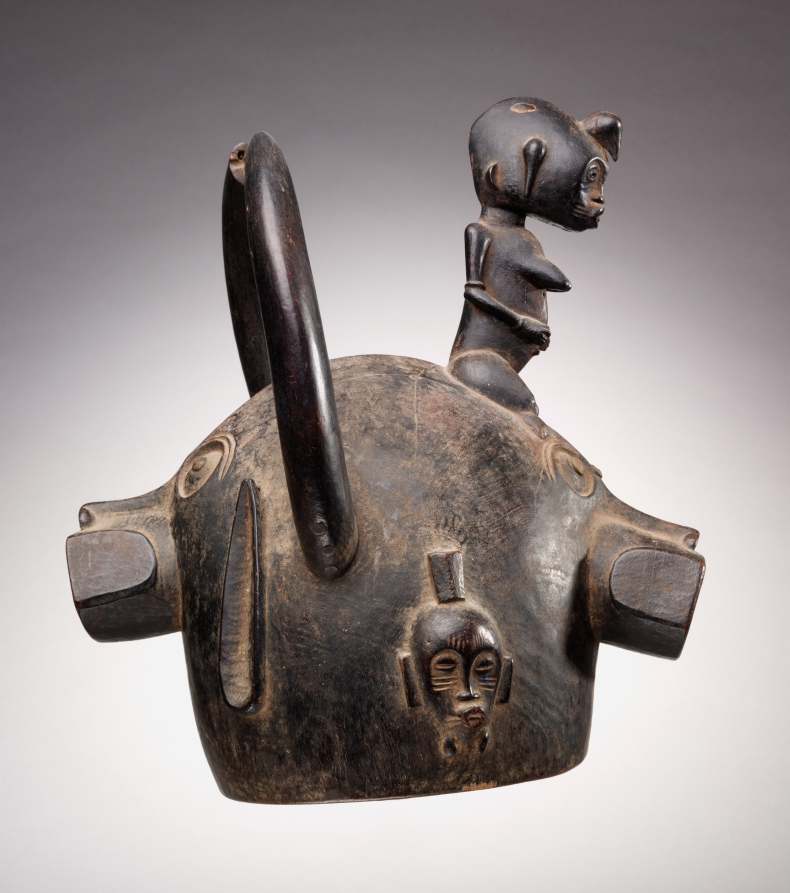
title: Helmet Mask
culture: Africa, West Africa, Côte d'Ivoire, Senufo-style carver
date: early to mid-1900s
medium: Wood, upholstery studs, and colorant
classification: Mask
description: This type of helmet was worn in rituals demonstrating a boy’s transition from one age group to the next, prior to his actual initiation into the secret Poro society. The pre-initiates were viewed as unknowing and anxious oxen, so the horns on such helmets may refer to those of horned cattle. The female figure alludes to women’s supernatural powers, which assure the welfare of Poro members.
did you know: Cowrie shells, feathers, and other accessories once decorated this helmet.